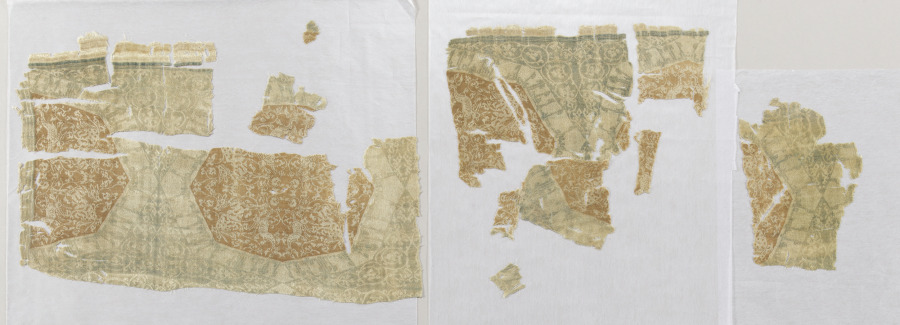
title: Fragment with Octagons and Four-Pointed Stars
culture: Iran ?, in the style of the Buyid period (945–1055)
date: 1521–1955 (radiocarbon date, 95% probability)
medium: Silk: lampas weave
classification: Textile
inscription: "inni la-'a'lamu wal-layl janan anna al-jannah fi arja' difafihi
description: The design consists of aligned large-scale octagons and four-pointed star-shaped interspaces filled with leafy scrolls. Each octagon encloses pairs of regardant gazelles and nonregardant rabbits in mirror image against a foliate background, patterned in white on a light pinkish-tan ground.